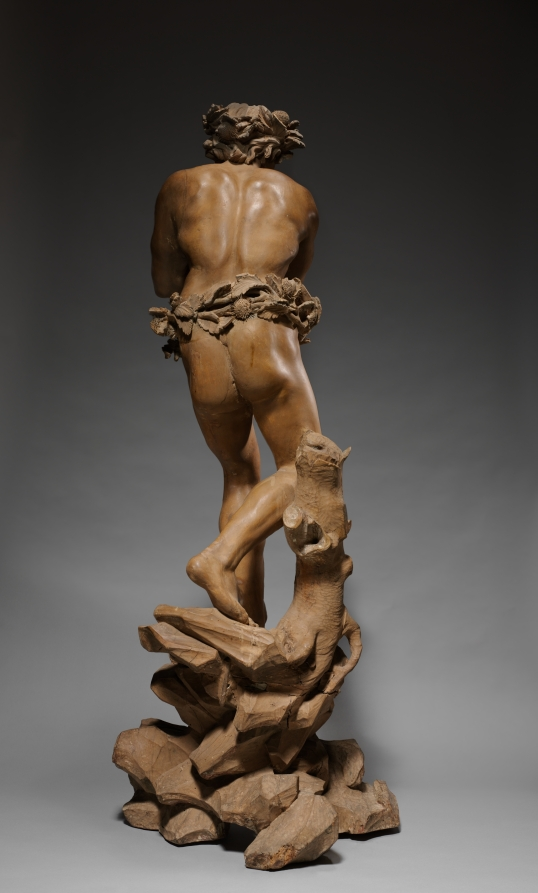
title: Winter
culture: Italy, 17th century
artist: circle of Filippo Parodi (Italian, 1630–1702)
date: c. 1700–1725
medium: wood with traces of gesso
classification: Sculpture